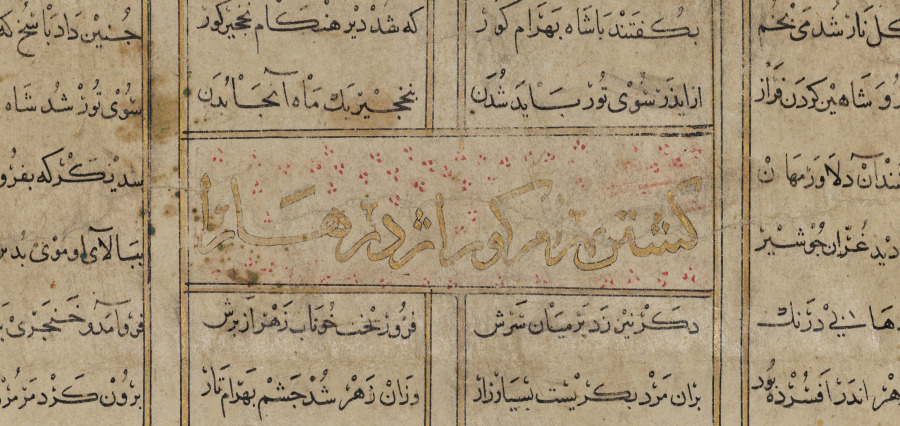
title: Bahram Gur Slays a Dragon (verso), from a Shahnama (Book of Kings) of Firdausi (940–1019 or 1025), known as the Great Mongol Shahnama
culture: Iran, Tabriz, Ilkhanid period (1256-1353)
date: 1330–35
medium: opaque watercolor, ink, and gold on paper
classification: Manuscript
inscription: Script: Naskh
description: In this intense painting, Bahram Gur plunges his sword into the breast of a dragon. A favorite character from Iran's pre-Islamic history, Bahram Gur (reigned 420–38 CE) was a popular ruler of the Sasanian dynasty and a great hunter. He took the name "Gur," meaning onager (a wild ass), because it was his preferred game, although he also excelled at killing dragons. As evidenced by this illustration's rock formations, tree trunk, and dragon, Iranian painting in the Mongol period borrowed numerous stylistic and spatial elements from Chinese models. With the surging landscape and writhing dragon rendered with equal energy, this is a picture of extraordinary unity and concentration.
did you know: The monumental Great Mongol Shahnama was commissioned by a ruler of the Ilkhanid dynasty, which governed the southwestern part of the Mongol Empire.